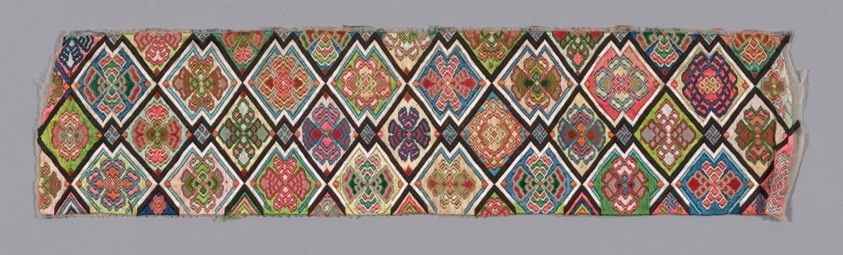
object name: Costume and Accessories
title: Band (from Woman's Trousers or Robe)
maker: China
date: 1875/1900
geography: China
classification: textile; needlework - costume; needlework (visual works); costume